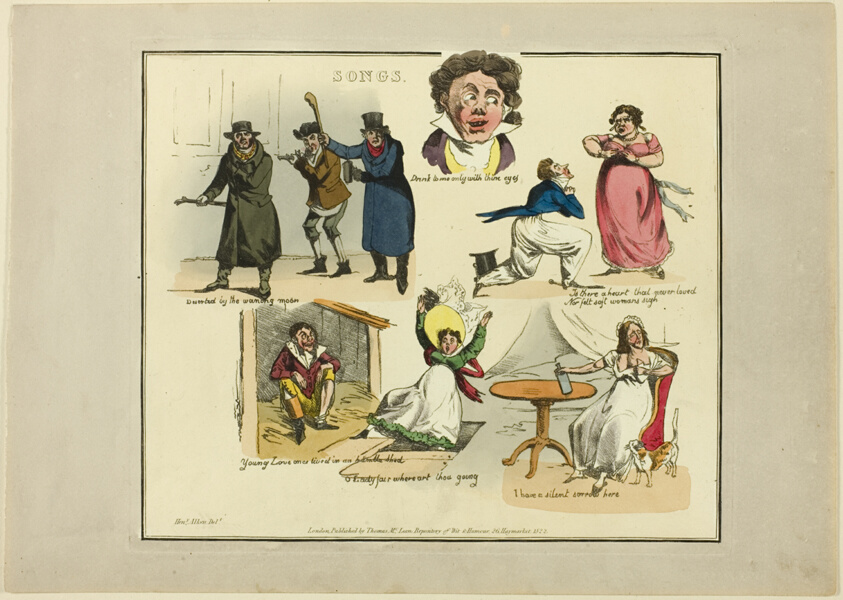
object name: Print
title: Plate from Illustrations to Popular Songs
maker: Henry Alken (English, 1785-1851); published by Thomas McLean (English, active 1790-1860)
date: 1822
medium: Soft ground etching with hand-coloring and aquatint on paper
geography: England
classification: etching; print; prints and drawing